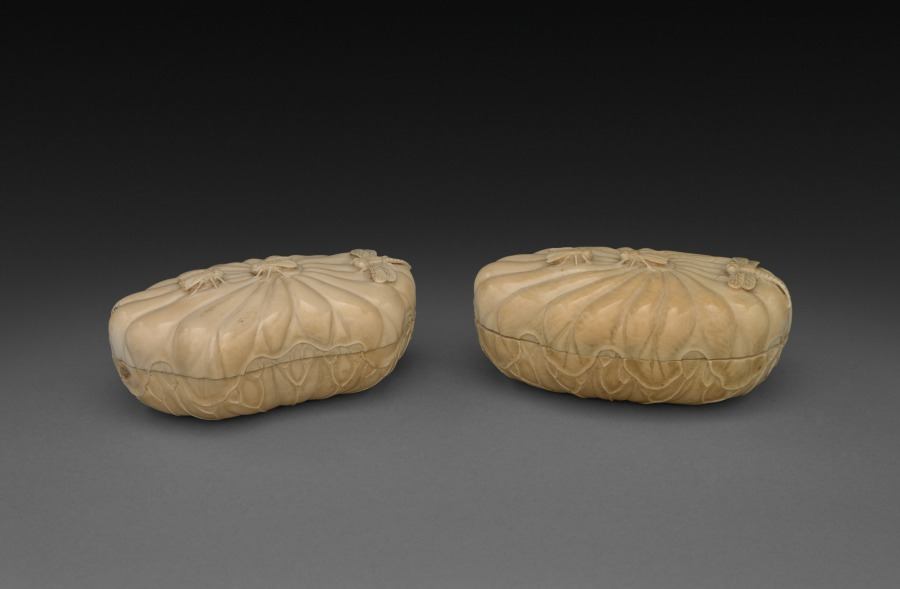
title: Pair of Boxes in Form of Lotus Leaves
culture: China, Qing dynasty (1644-1911)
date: 1700s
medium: ivory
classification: Ivory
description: In the Qing dynasty (1644–1911), luxury items became more affordable to larger parts of the society, including women, merchants, and literati in non-official positions. Imperial patronage and a growing urban population encouraged consumption of luxury goods and local craftmanship. This fine-grained, light yellow ivory carved the the shape of a lotus leaf illustrates the superb carving skills and the creative mind of the talented artisan who sought clients on a competitive market.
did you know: Inside each box is a lotus pond and two swimming ducks carved in high relief.